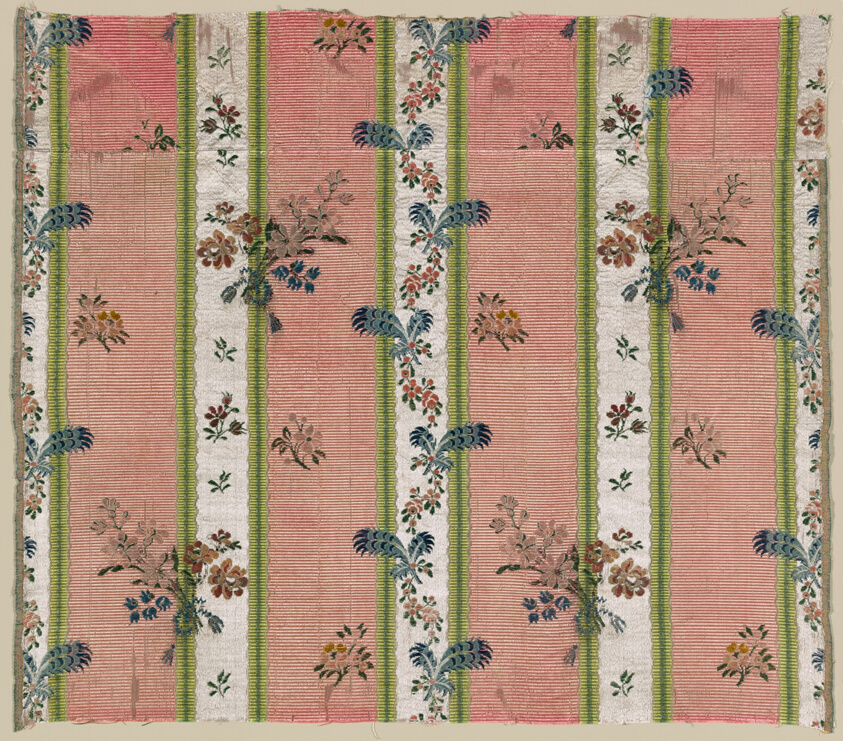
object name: Textile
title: Fragment (Dress Fabric)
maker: France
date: 18th century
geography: France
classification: textile; weaving